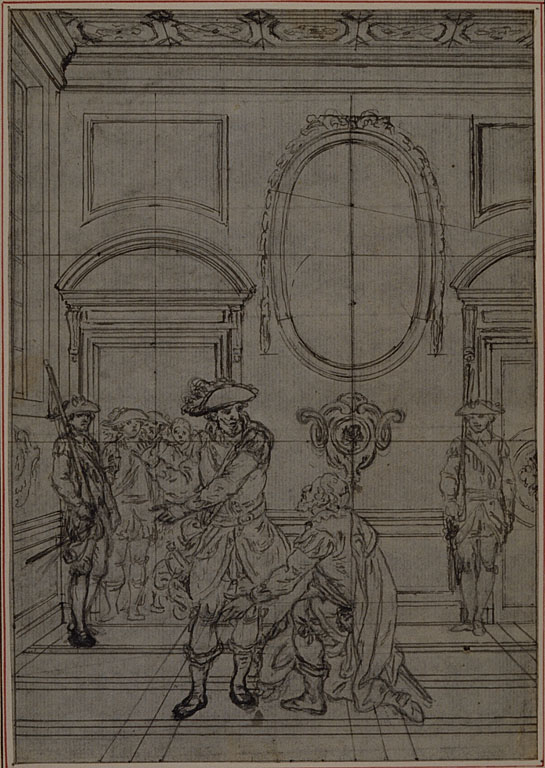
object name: Drawing and Watercolor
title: Study for a second edition, never published, of Colle's "La Partie de Chasse de Henri IV", Act I, Scene 6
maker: Hubert François Gravelot (French, 1699-1773)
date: before 1766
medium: Pen and black ink, over graphite, on gray laid paper, incised for transfer and perimeter mounted on ivory laid paper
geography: France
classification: pen and ink drawings; drawings (visual works); prints and drawing